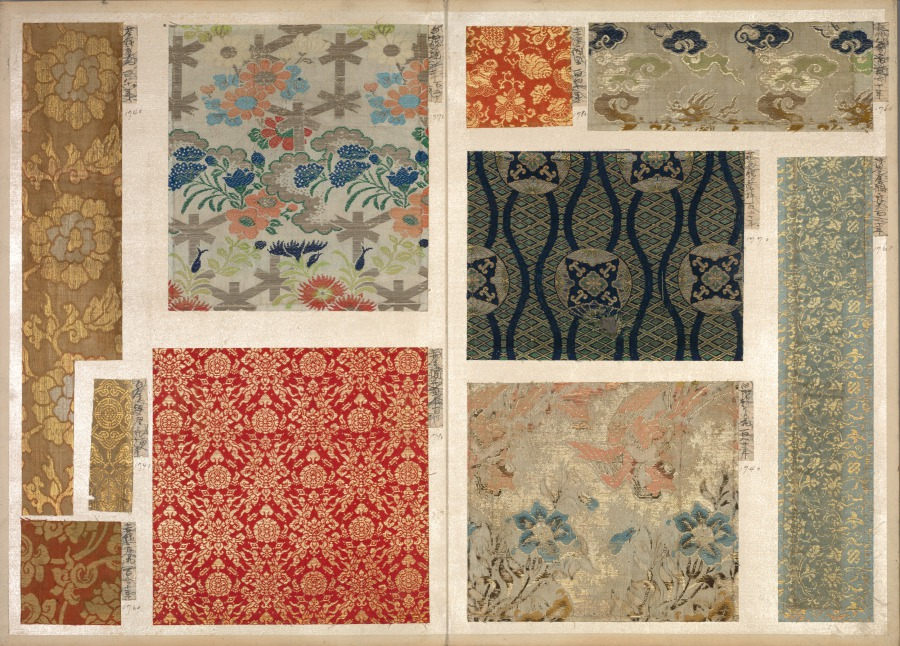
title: Album of Textile Samples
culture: Japan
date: 1790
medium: silk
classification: Textile